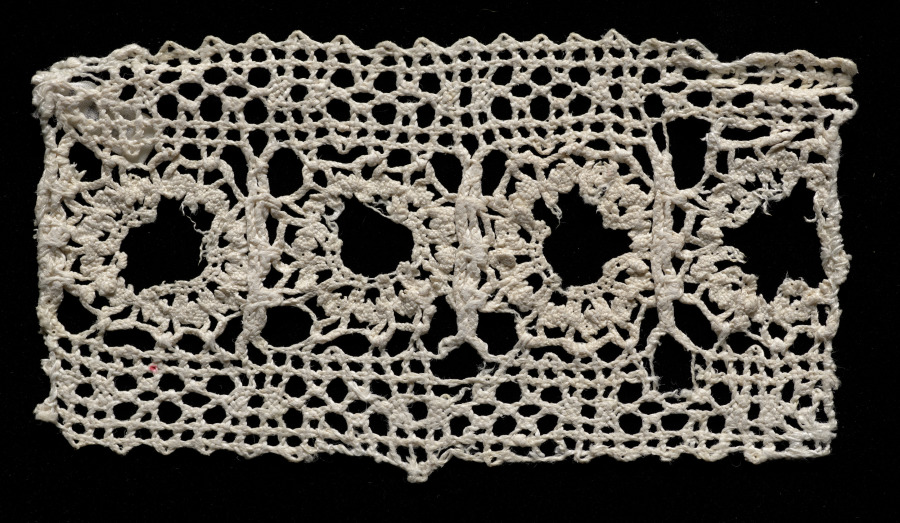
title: Bobbin Lace (Plaited Lace) Edging of Points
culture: Italy, Genoa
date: second half of 16th century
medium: lace, bobbin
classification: Lace